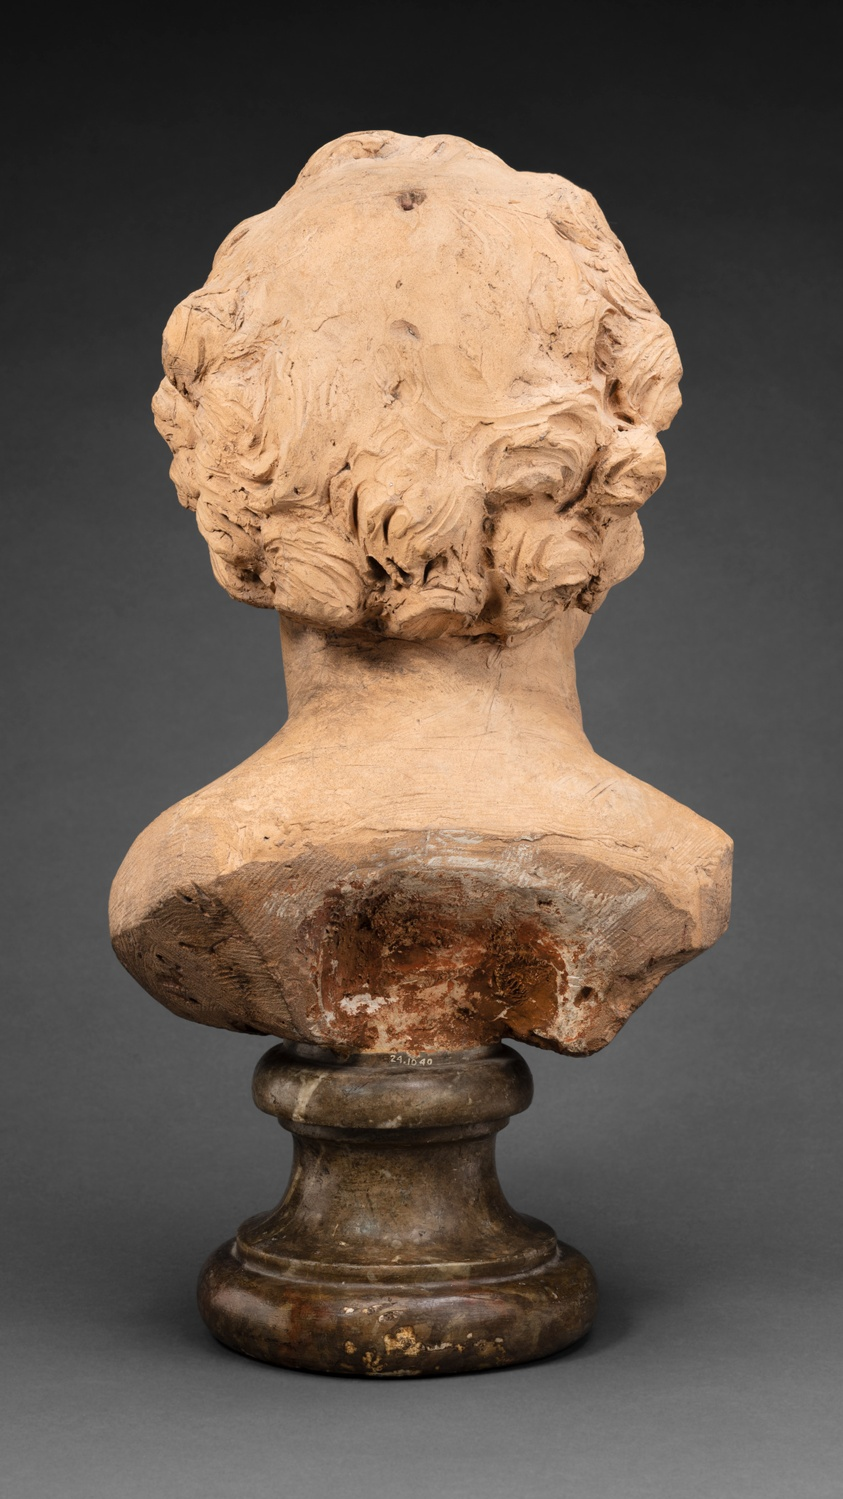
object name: Sculpture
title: Bust of Piron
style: 18th Century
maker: Attributed to Jean-Baptiste Lemoyne II (French, 1704–1778)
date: 1750/60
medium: Terracotta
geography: France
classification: bust/head; sculpture; portrait; french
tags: busts, head, man, portrait, portraits, portraits: male subject